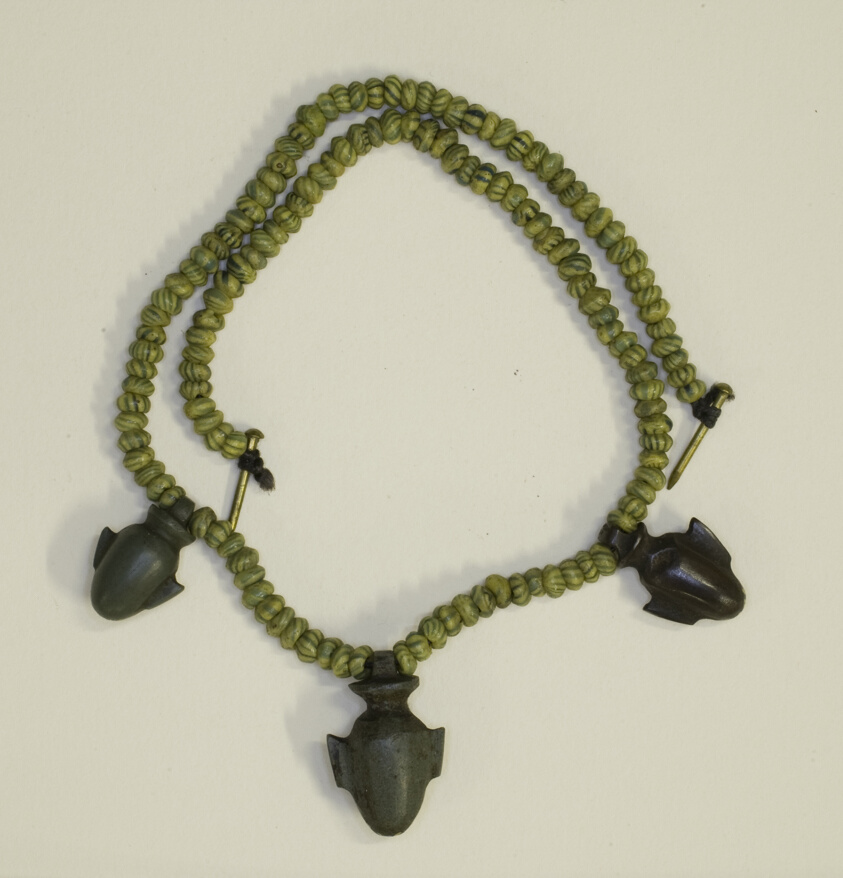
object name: Costume and Accessories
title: Amulet of a Heart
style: late period (egyptian), egyptian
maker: Egyptian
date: Late Period, Dynasty 26–31 (664–332 BCE)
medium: Stone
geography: Egypt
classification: amulet; jewelry; ancient art; bead; costume